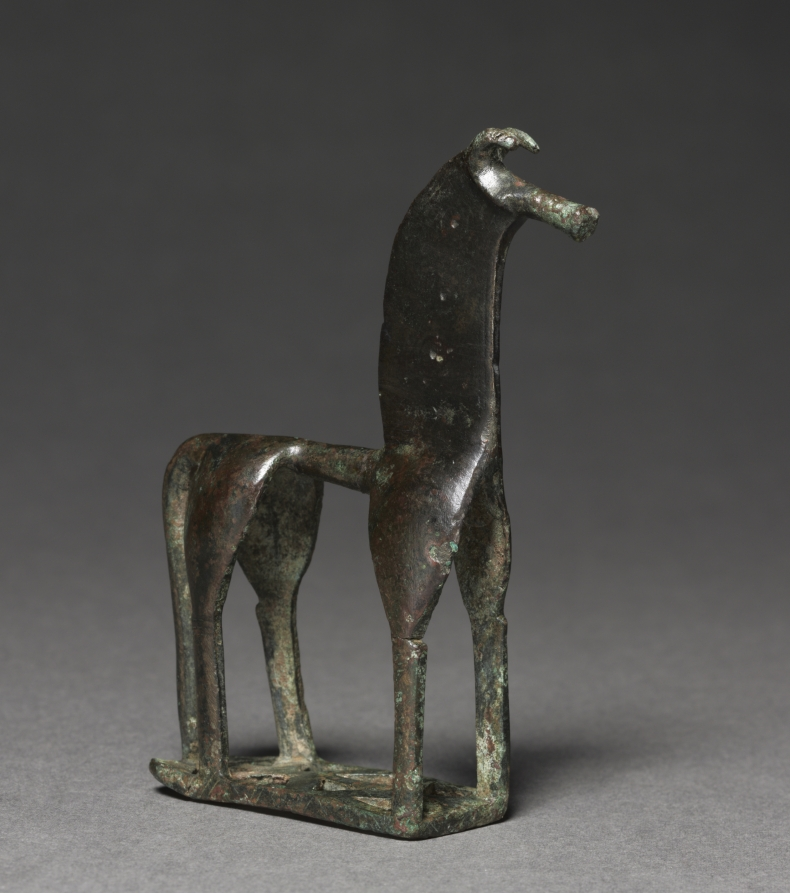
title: Statuette of a Horse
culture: Greek, Geometric, probably Corinthian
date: 750–700 BCE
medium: bronze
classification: Sculpture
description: Cast using the lost-wax process, this bronze horse with perforated stand is conceived in profile, its balanced and stylized forms designed for clarity and legibility. Among thousands of bronze animal figurines produced across the Greek world in the Geometric period, this example stands out for its intact condition and large size. Although lacking a known findspot, its form suggests that it may have been produced in a Corinthian workshop.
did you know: The triangular perforations in this statuette’s base give an impression of translucence, perhaps alluding to water.